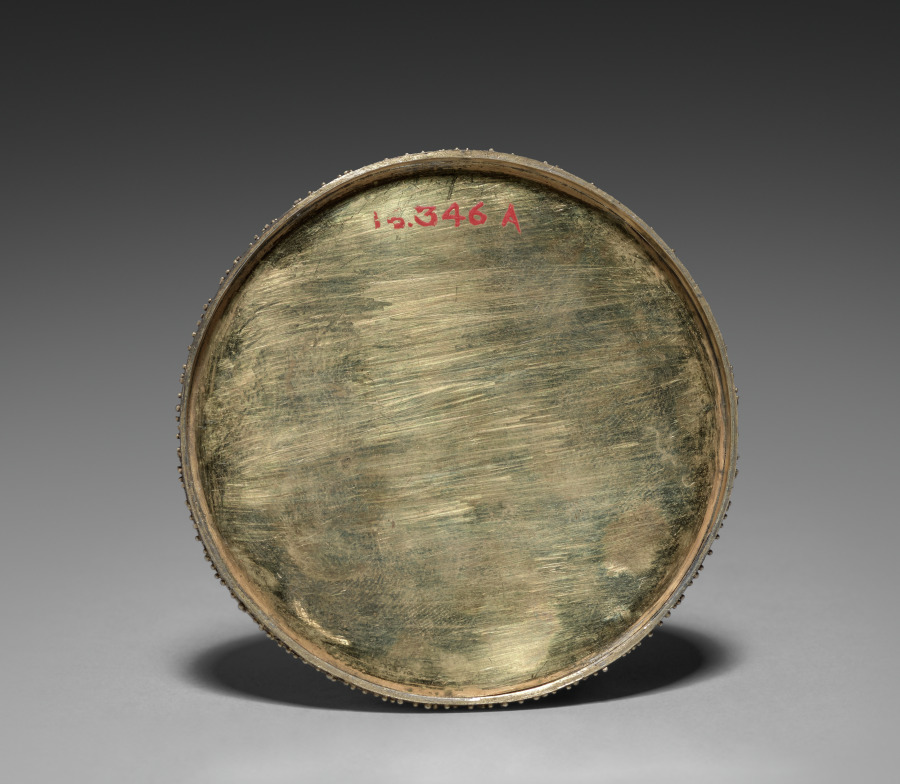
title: Box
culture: Germany ?, late 18th century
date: late 1700s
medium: enamel on copper with gilt metal mounts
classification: Miscellaneous